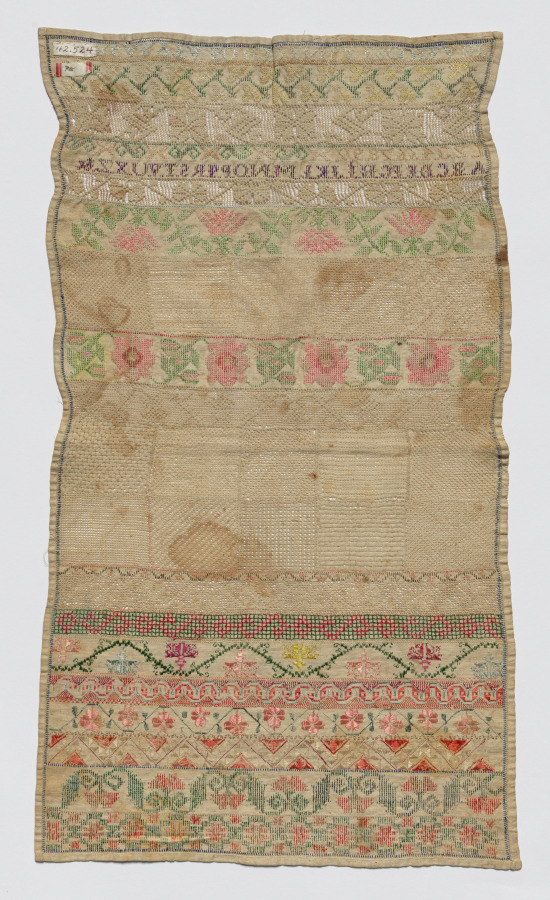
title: Sampler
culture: Mexico, 19th century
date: 1800s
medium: embroidery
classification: Sampler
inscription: at top, "MARGARYTA LOJEROENLA SCHOOL DE -----" and a row of numerals and alphabet.